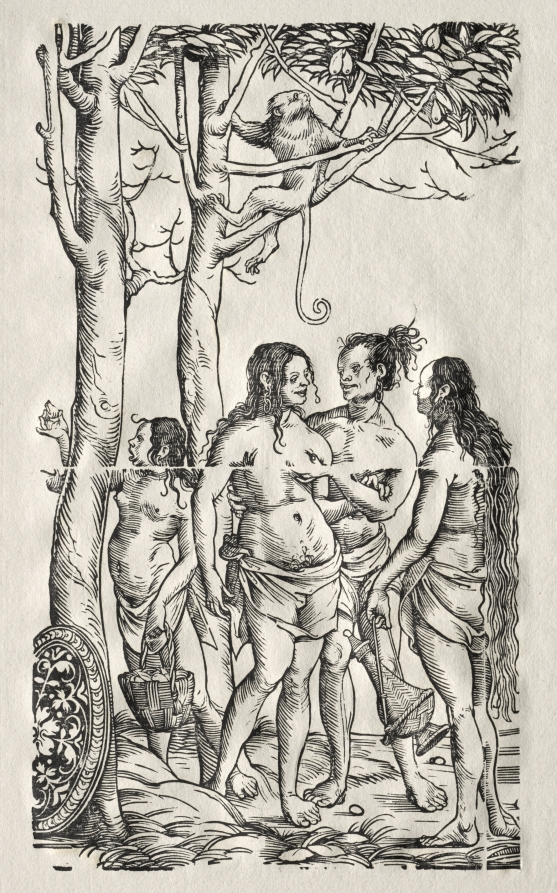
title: Hottentots with herd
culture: Germany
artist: Hans Burgkmair (German, 1473–1531)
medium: woodcut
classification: Print